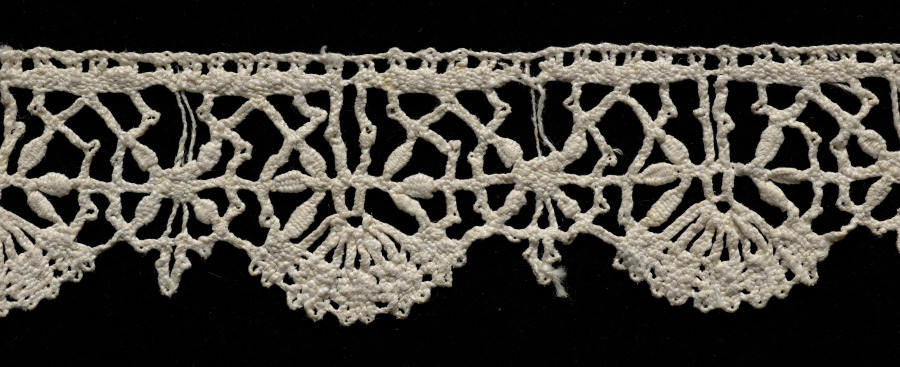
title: Lace Edging of Bell Points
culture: Italy, Genoa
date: 1600s–1700s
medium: Bobbin lace (rose lace)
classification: Lace